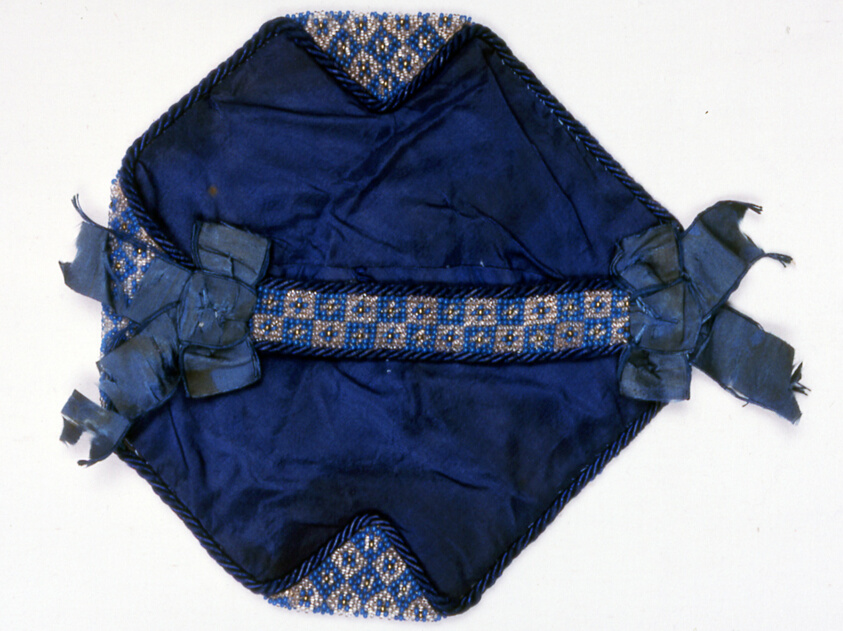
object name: Costume and Accessories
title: Bag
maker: United States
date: 1830/35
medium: Cotton, plain weave; beaded with glass and metal beads; lined with silk, plain weave; edged with silk and cotton cording; two ribbons: silk and cotton, plain weave; drawstrings: silk, plain weave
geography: United States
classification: textile; bag - needlework; costume accessory - bag; costume